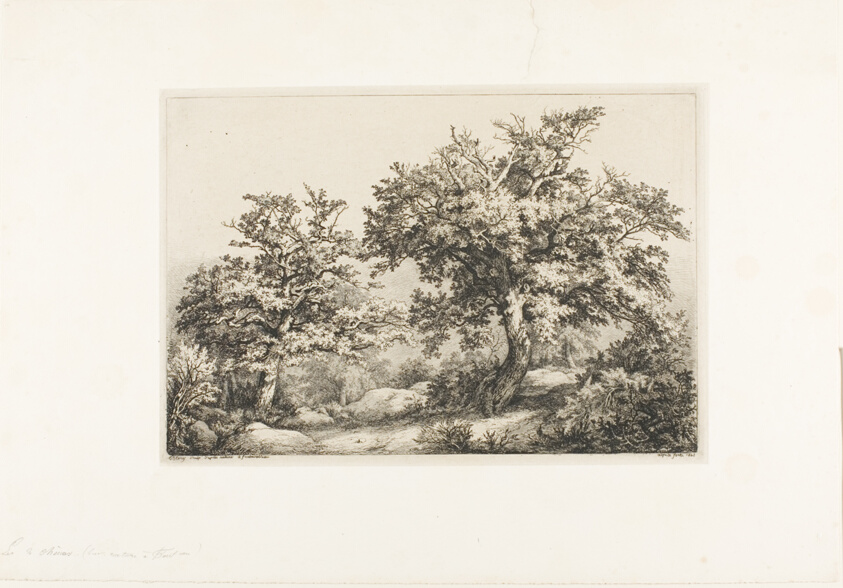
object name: Print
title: The Two Oaks, Fontainebleau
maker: Eugène Blery (French, 1805-1887)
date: 1842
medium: Etching, roulette, and drypoint on ivory wove chine collé on ivory wove paper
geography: France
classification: etching; print; prints and drawing